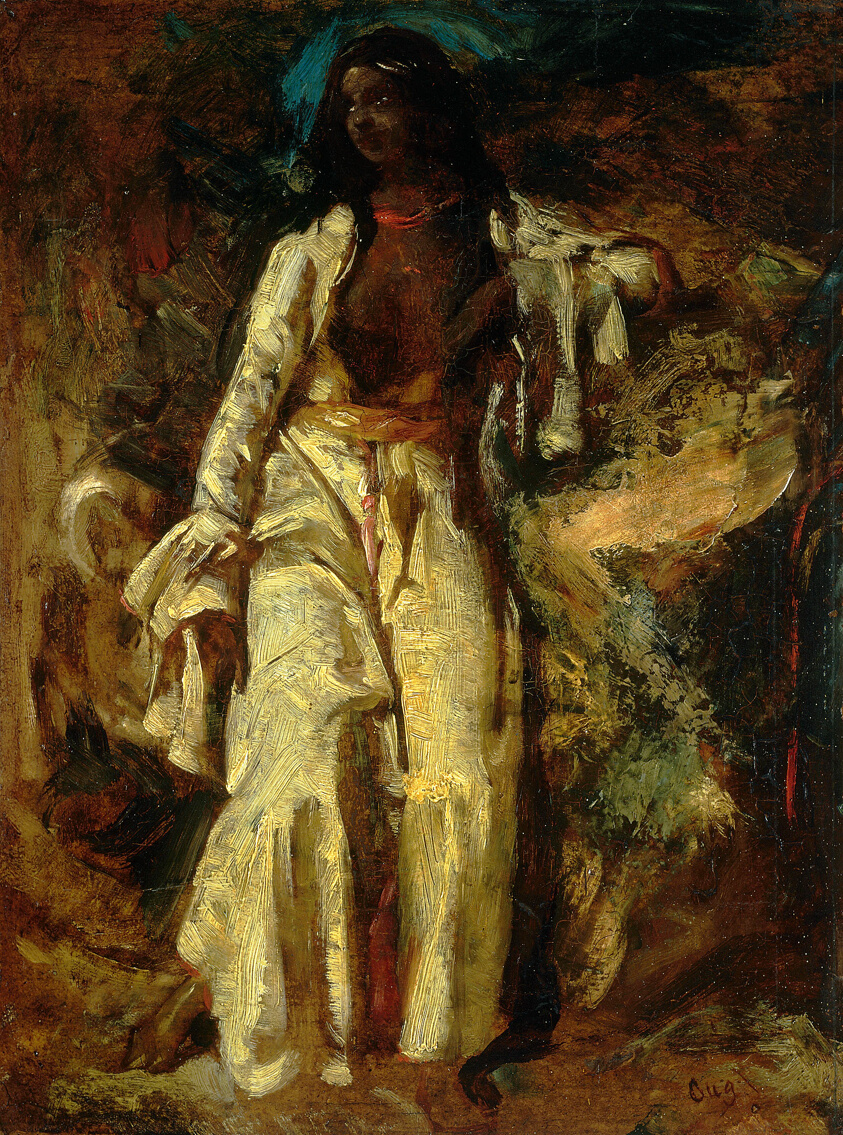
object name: Painting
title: Nubian Woman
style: 19th century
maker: Jules-Robert Auguste (French, 1789-1850)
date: 1825/30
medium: Oil on panel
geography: France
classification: painting; oil; oil on panel; paint; european painting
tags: woman, African, female figures, female, portraits, portraits: African subject, portrait